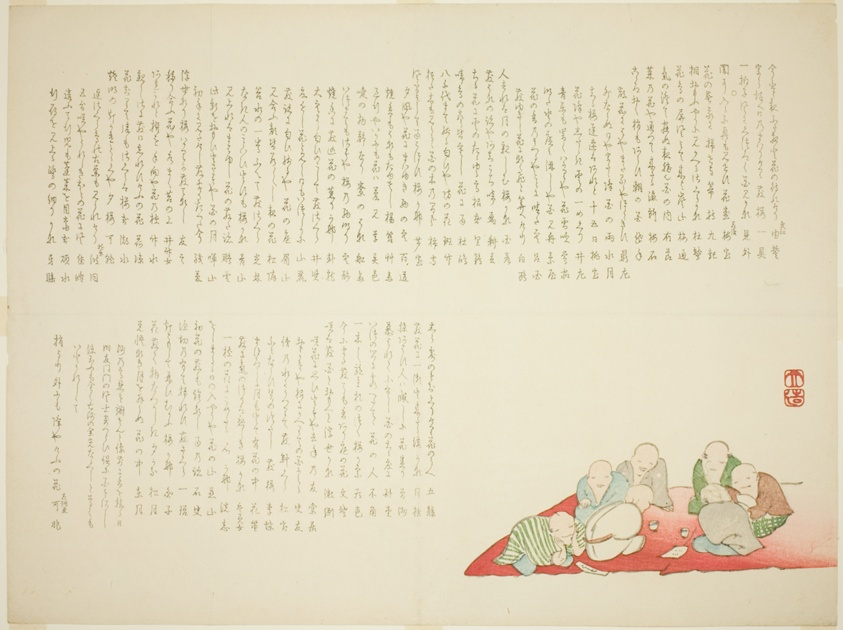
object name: Print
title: A Gathering of Monks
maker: Yabu Chosui (Japanese, 1814-c. 1870)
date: 19th century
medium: Color woodblock print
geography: Japan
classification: print; asian art